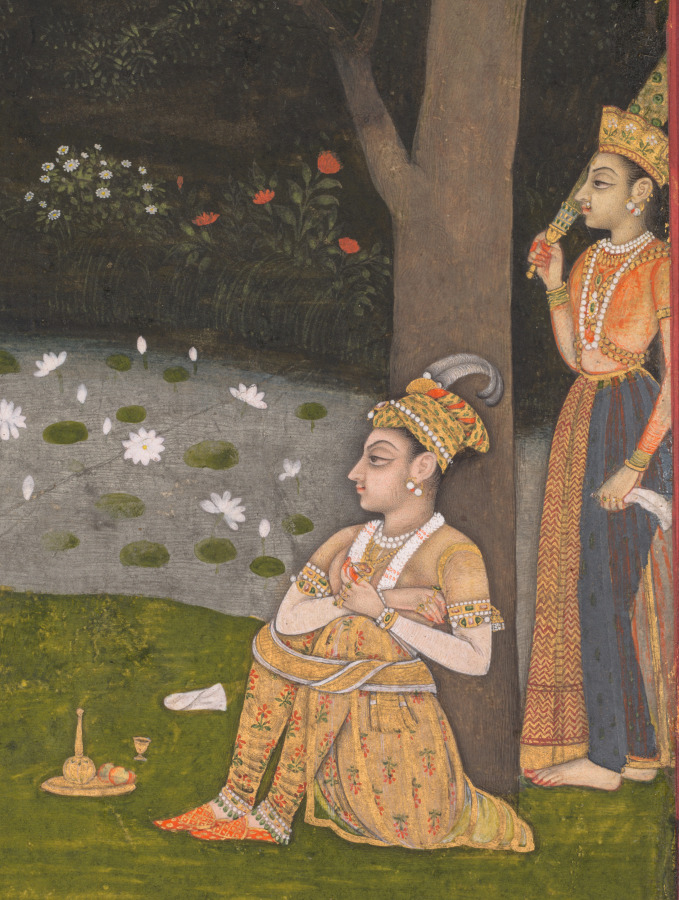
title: Princely ascetic in the forest visited by ladies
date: c. 1760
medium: Gum tempera and gold on paper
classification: Painting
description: At first glance a group of court women has gathered to visit a prince who abandoned the palace to practice yoga, as indicated by the strap around the knees of the figure seated at the right. Upon close inspection, however, the prince is being “played” by a woman dressed for the part. All the components of a pleasurable courtly Mughal gathering are present. A sumptuous carpet, bottles of alcohol, fruit, a hookah, breath-freshening paan, and a woman playing a vina have been set up in the forest as if in the palace.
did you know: Hennaed fingers and jeweled anklets confirm that this prince is a woman.